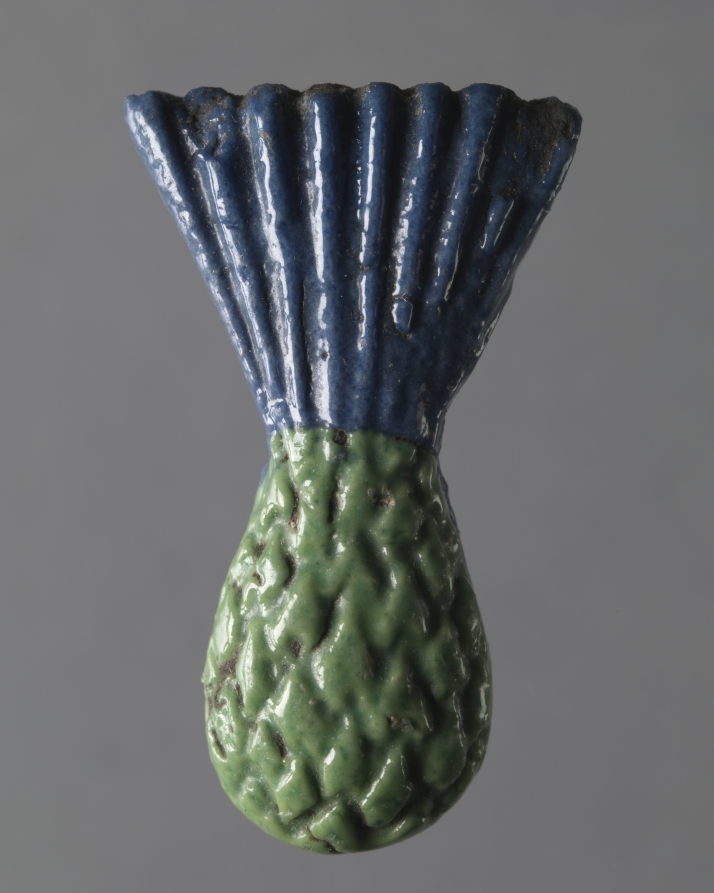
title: Cornflower Inlay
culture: Egypt, New Kingdom (1540–1069 BCE), Dynasty 18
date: 1350–1296 BCE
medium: polychrome faience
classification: Amulets